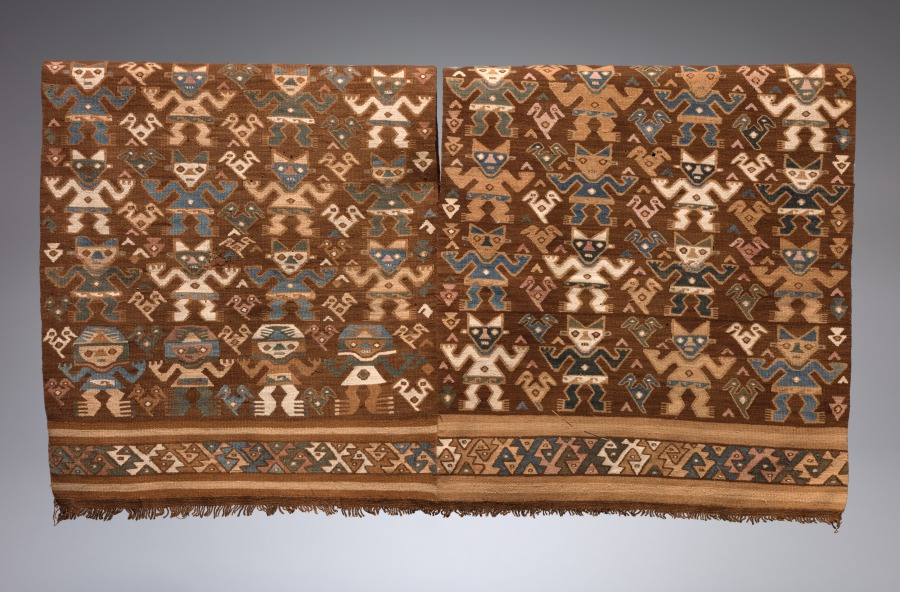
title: Tunic with Frontal Figures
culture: Central Andes, Central Coast, Ychsma (Pachacamac) people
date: 1400–1532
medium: Cotton; slit tapestry weave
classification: Textile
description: This tunic was made by weavers of the Ychsma (yeach-mah) people, who were affiliated with Pachacamac, a vast religious center that housed an oracle. The figures repeated across its composition may represent important ancestors or high-ranking members of society. The tunic likely dates to the period after the Inka Empire conquered Ychsma coastal territory, eventually becoming the largest Indigenous empire to have existed in the ancient Americas.